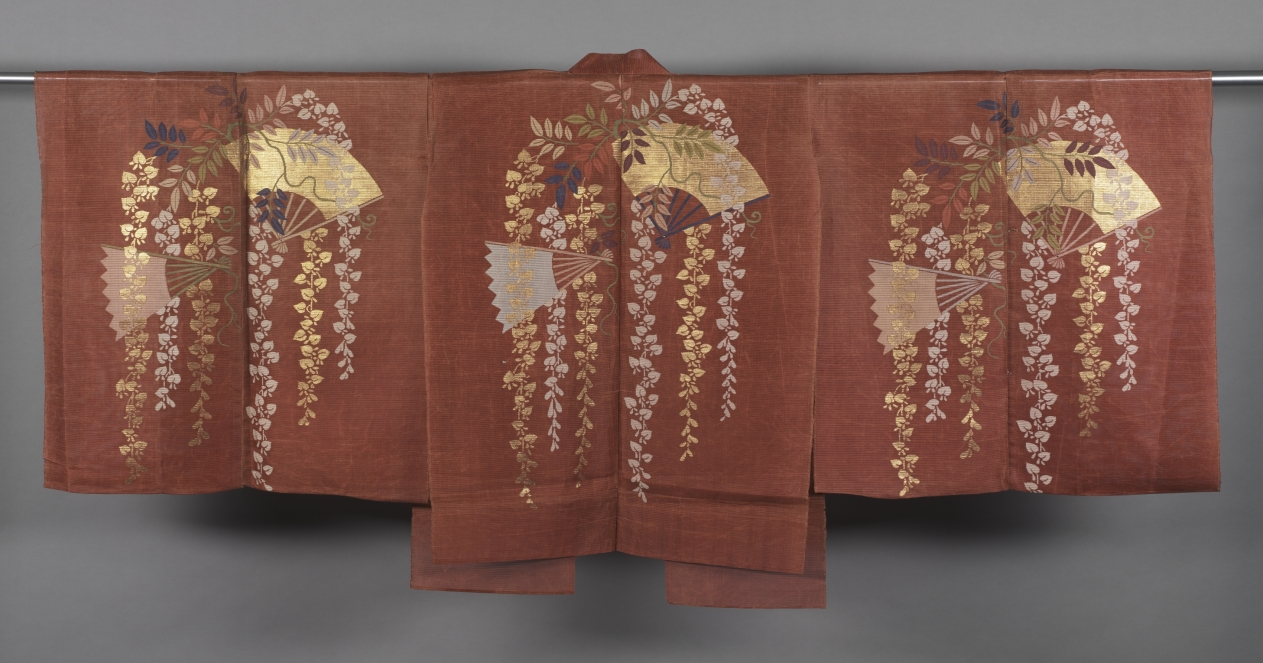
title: Noh Costume (Chōken)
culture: Japan, Edo period (1615–1868)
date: 1800–1850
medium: gauze; silk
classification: Garment